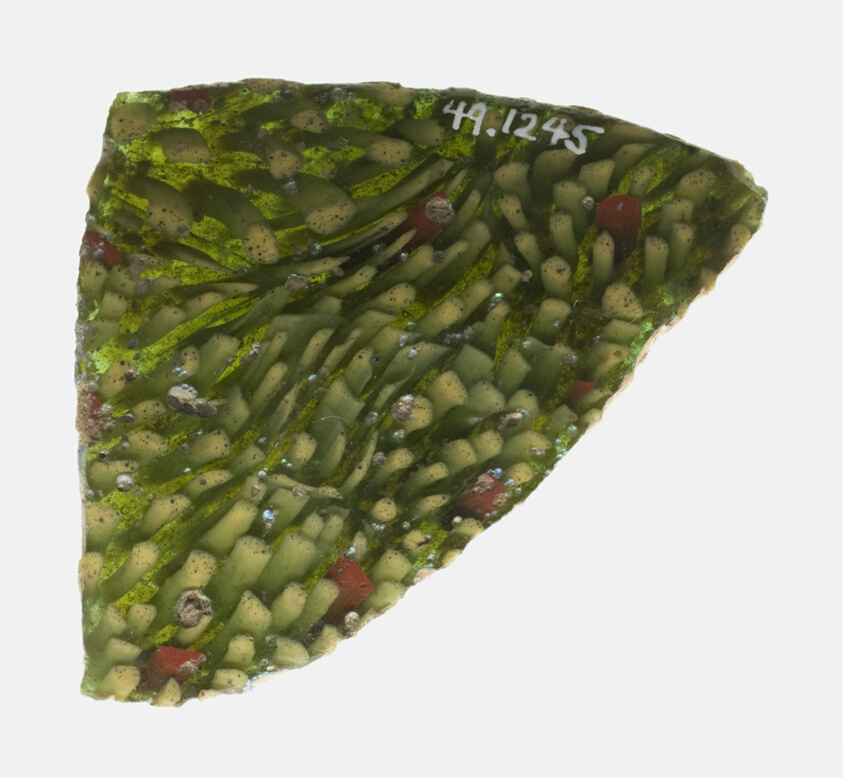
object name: Decorative Arts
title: Fragment of a Bowl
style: roman (ancient, style or period), ancient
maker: Roman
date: 1st century BCE–1st century CE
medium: Glass, mosaic glass technique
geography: Italy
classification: fragment; decorative arts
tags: decoration